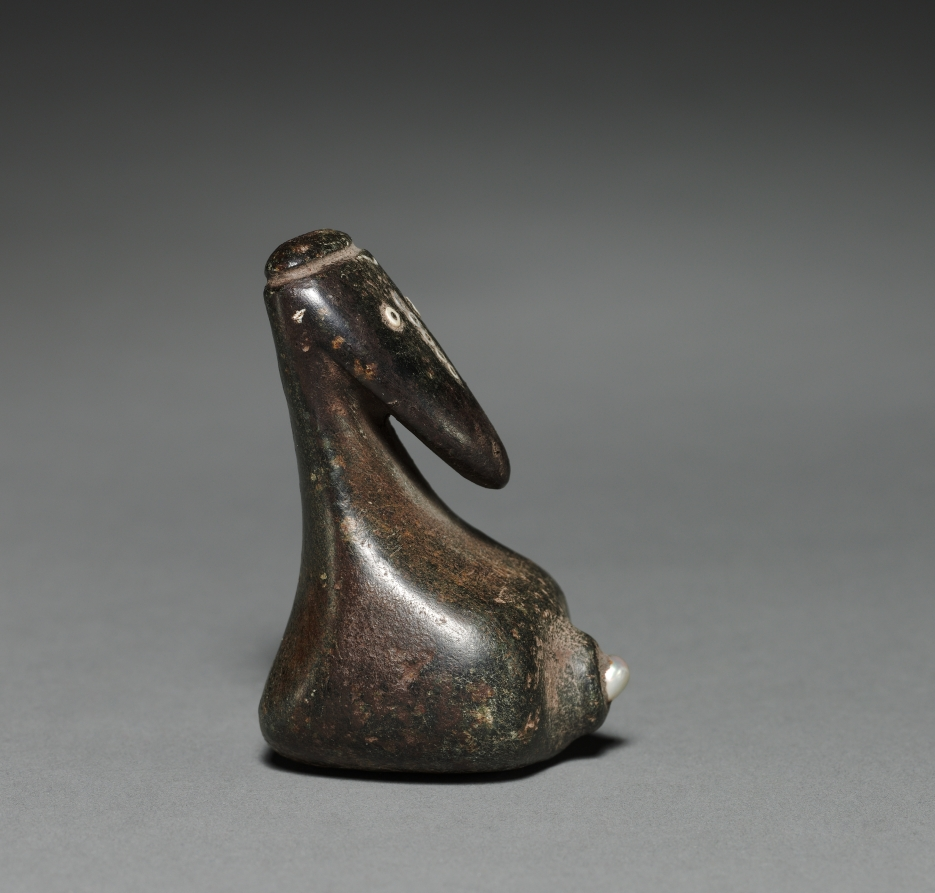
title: Pelican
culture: America, North American Indian, Channel Islands, Island of San Nicolas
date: 1800s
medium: stone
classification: Sculpture